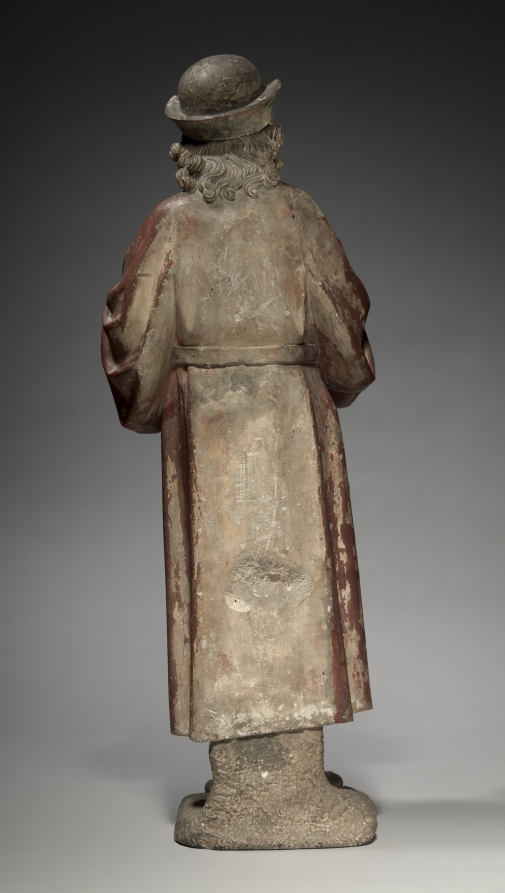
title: Magus from an Adoration Group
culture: France, possibly Champagne, 15th century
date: c. 1460–1475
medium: polychromed limestone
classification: Sculpture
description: This sculpture represents one of the three Magi or kings who witnessed the birth of Jesus. The Magi are identified as Caspar, Melchior, and Balthazar and are typically shown in art bearing their gifts of gold, frankincense, and myrrh. Joseph is often present in these scenes as are shepherds.The single figure shown here was originally part of a sculptural group with many figures. He is shown holding an ornate receptacle with lid. Other figures from the group are not known to have survived, and which Magus the sculpture was intended to represent cannot be clearly established.